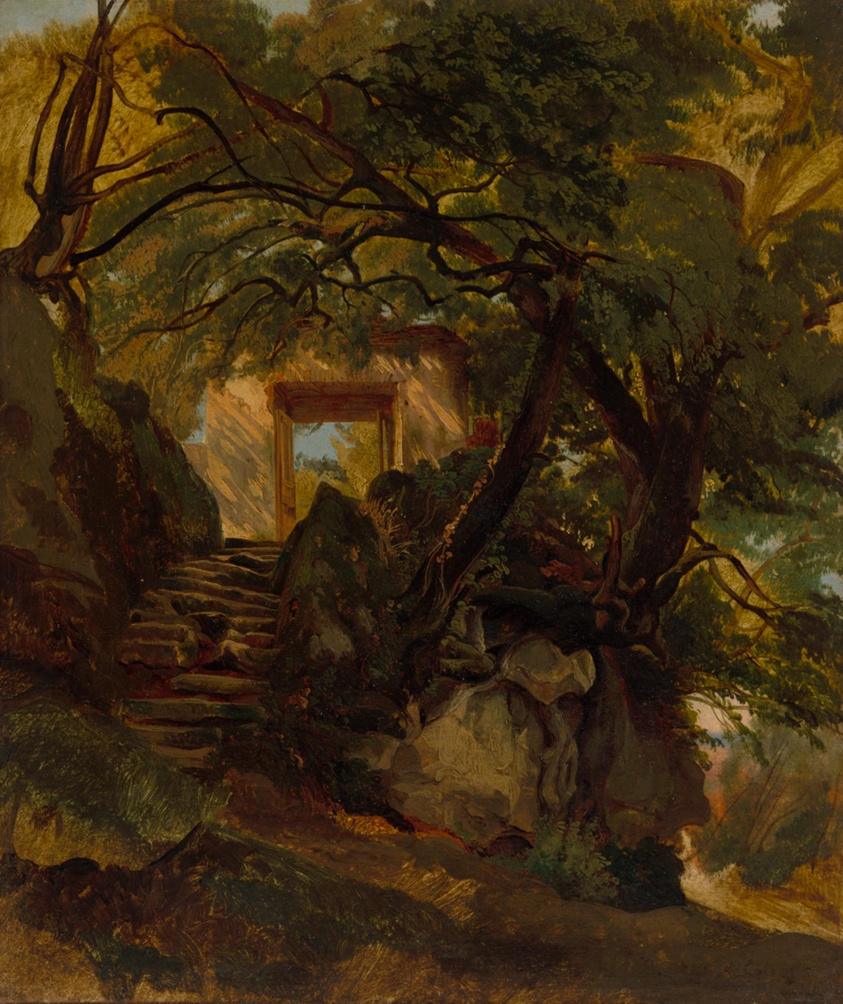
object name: Painting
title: Staircase in the Park of Villa Chigi di Ariccia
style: 19th century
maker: Alexandre Calame (Swiss, 1810–1864)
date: 1844/1845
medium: Oil on paper, laid on canvas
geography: Switzerland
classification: oil on paper, laid on canvas; european painting; oil on paper; paint; painting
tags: stairs, gates, doorway, trees, nature, landscape, parks, villa